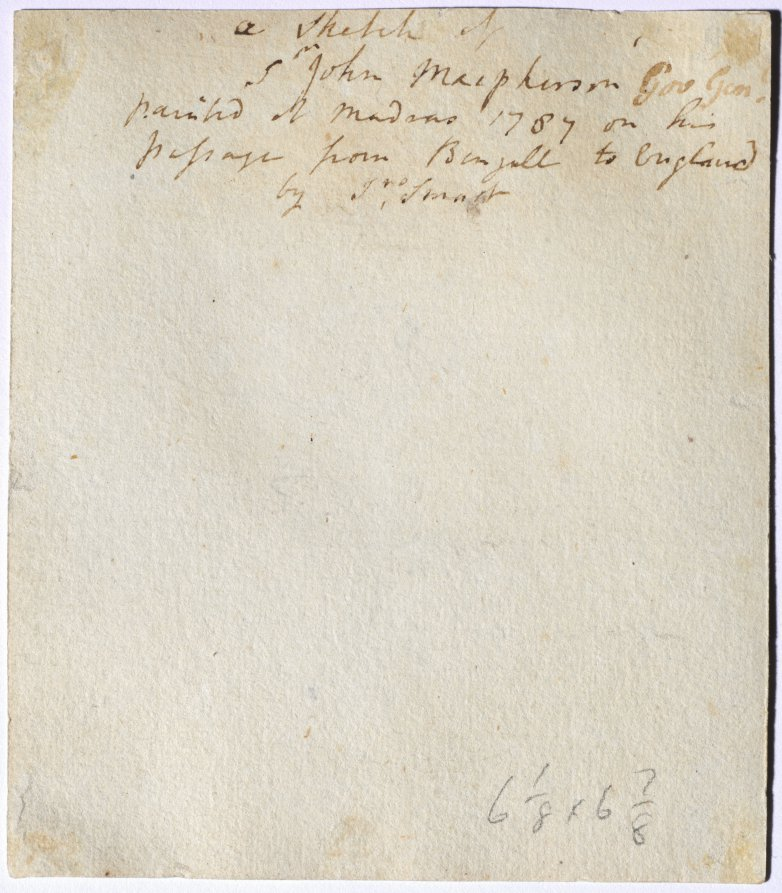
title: Portrait of Sir John Macpherson, 1st Baronet, Governor-General of India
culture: England, 18th century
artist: John I Smart (British, 1741–1811)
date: 1787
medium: watercolor and gouache heightened with white gouache on paper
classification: Portrait Miniature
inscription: signed, lower right, in black ink: J S / 1787 / Madras ; VERSO, lower right, in graphite: 6 1/8 x 6 7/8 Foskett, Daphne. John Smart: The Man and His Miniatures, pp. 13, 76, 89. London: Cory, Adams & Mackay, 1964.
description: The sitter’s head and shoulders face left. He smiles slightly and has light blue eyes, with his powdered hair curled above the ear and tied en queue. He wears a green jacket edged in gold with gold buttons and dons a high white collar, a waistcoat, and a frilled cravat, each highlighted with white gouache. The nature of this work as a finished drawing rather than exclusively a preparatory sketch for a miniature on ivory is evident in the degree of finish of the sitter’s clothing, which is painted to the oval termination within a border of pale blue gouache. A Colnaghi label was removed from the verso after the work entered the museum’s collection. Sir John Macpherson (1745–1821) was the son of a Scottish minister. His many tours of service with the East India Company were marred by corruption and scandal. He was made acting governor-general of India in 1785–86 between the resignation of Warren Hastings (1732–1818) and the succession by Lord Cornwallis (1738–1805). Macpherson was created a baronet in 1786 when he was removed from office, returning to England shortly thereafter. He was an inveterate bachelor, popular in society for his handsomeness, charm, and facility with languages, but also known for his avarice and fraudulence. The work is signed with Smart’s initials and dated “1787 Madras” at the lower right. Macpherson was no longer governor-general in 1787 and would have been preparing to return to England when this portrait was painted. The drawing is inscribed on the back in the artist’s hand: “a sketch of Sir John Macpherson painted at Madras, 1787, on his passage from Bengall [sic] to England by Jno [sic] Smart.” Smart did not return to England until 1795, so the word passage must be defined as “on his journey” rather than “aboard ship.” At the time this portrait was taken, Macpherson was grappling with his premature removal from office and beginning to plot what would become many years of negotiations to regain his position or receive compensation for having lost it, though none of this emotional turmoil is visible in Smart’s portrait.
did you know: John Smart retained hundreds of sketches which were passed down in turn to his son, granddaughter, and great-grandchildren.